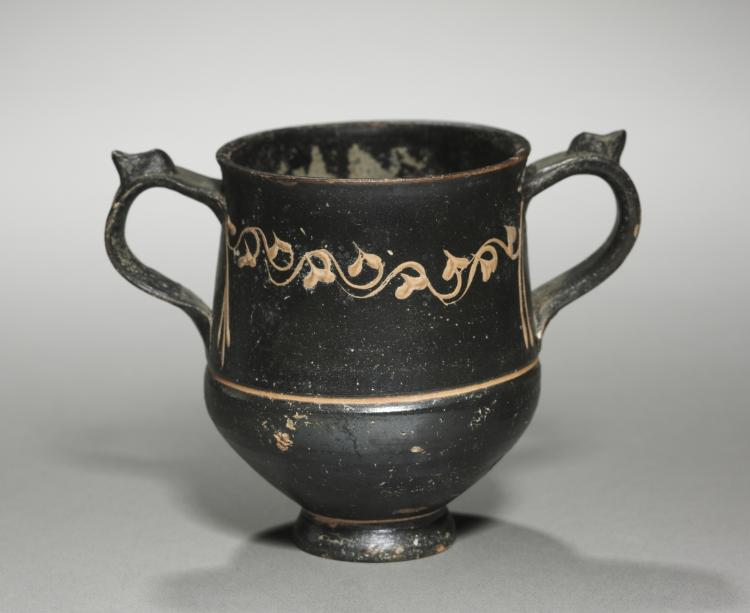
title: Black-Gloss Kantharos (Drinking Cup)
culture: Greek, Attic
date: c. 300–275 BCE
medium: ceramic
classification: Ceramic